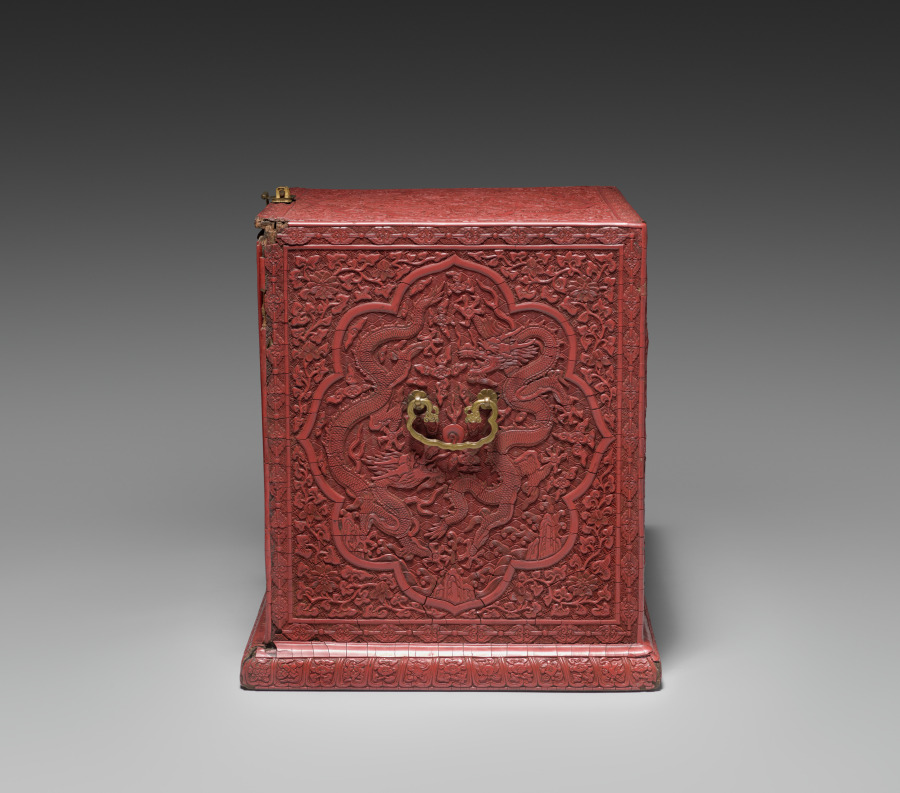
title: Tihong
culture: China, Ming dynasty (1368-1644), Wanli reign (1572-1620)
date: 1585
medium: carved cinnabar lacquer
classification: Lacquer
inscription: 大明萬曆乙酉年製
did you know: An inscription on the base of the chest dates it to 1585.